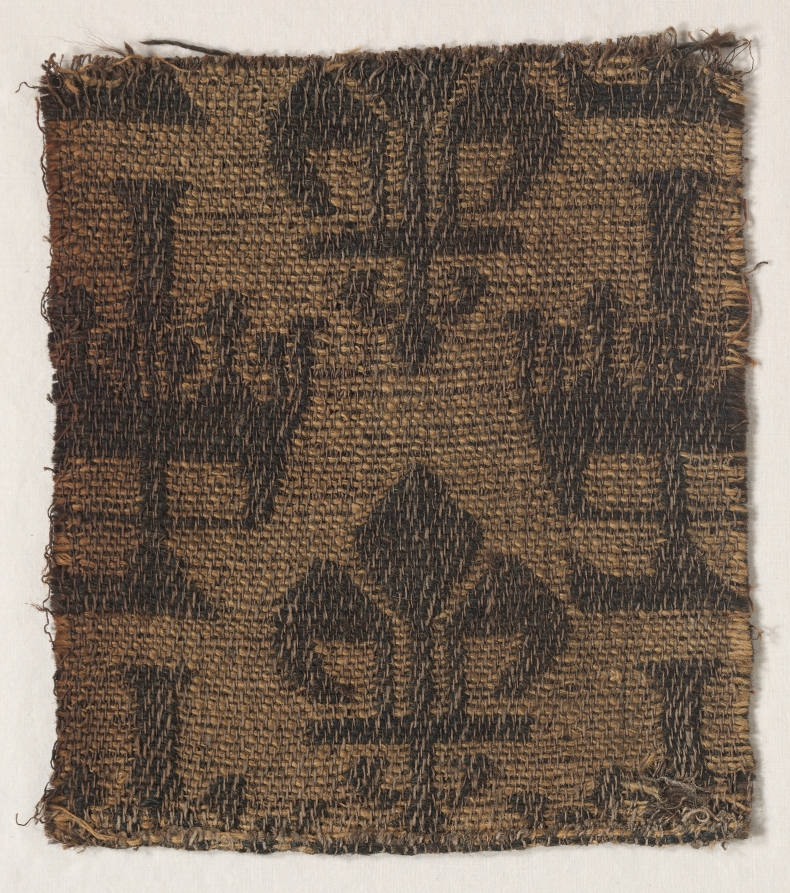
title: Wool Damask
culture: France, 17th-18th century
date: 1600s - 1700s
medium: damask; wool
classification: Textile